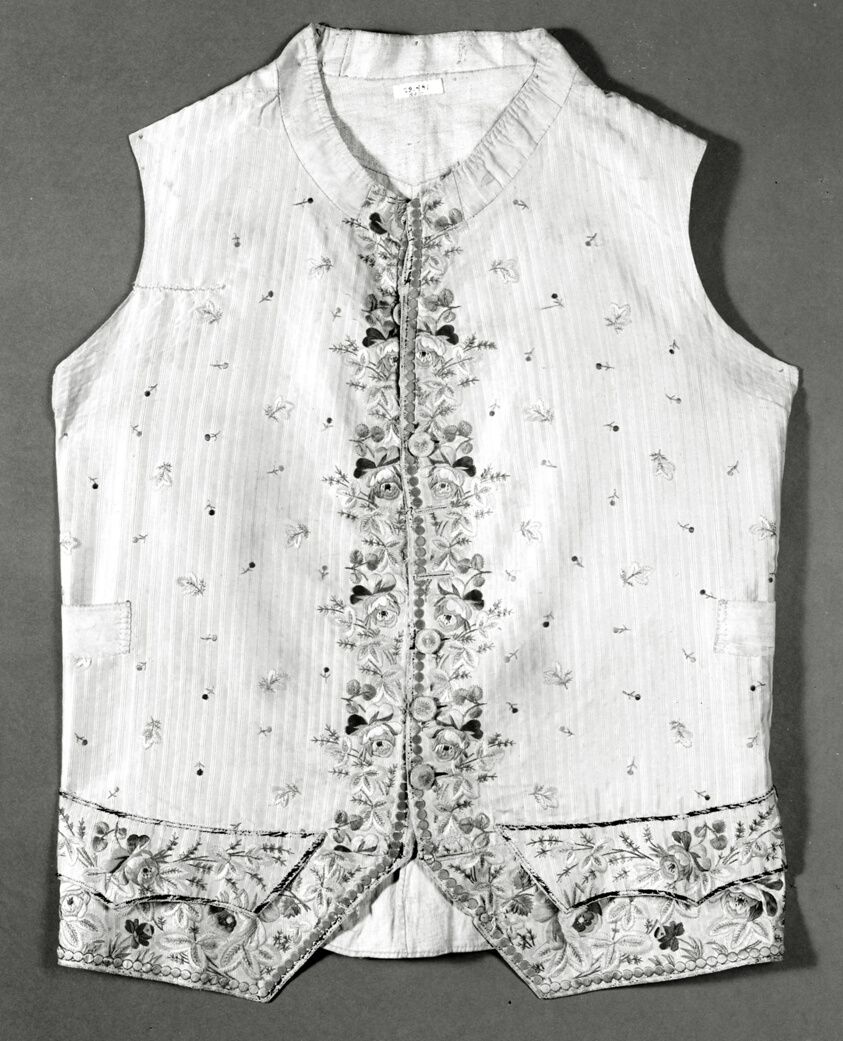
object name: Costume and Accessories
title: Waistcoat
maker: England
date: 18th century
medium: Silk, plain weave; embroidered with silk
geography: England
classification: textile; needlework (visual works); costume; dress (garment); clothing